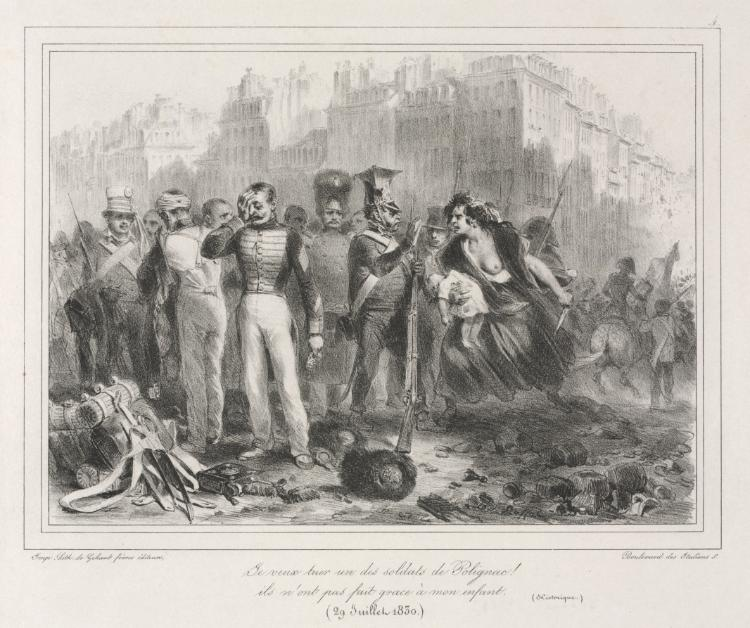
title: Album of 1831: I want to kill one of Polignac's soldiers. They did not spare my child (Historic)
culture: France, 19th century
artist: Auguste Raffet (French, 1804–1860)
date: 1830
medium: lithograph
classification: Print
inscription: inscribed lower margin, center, in stone: "29 Juillet 1830"